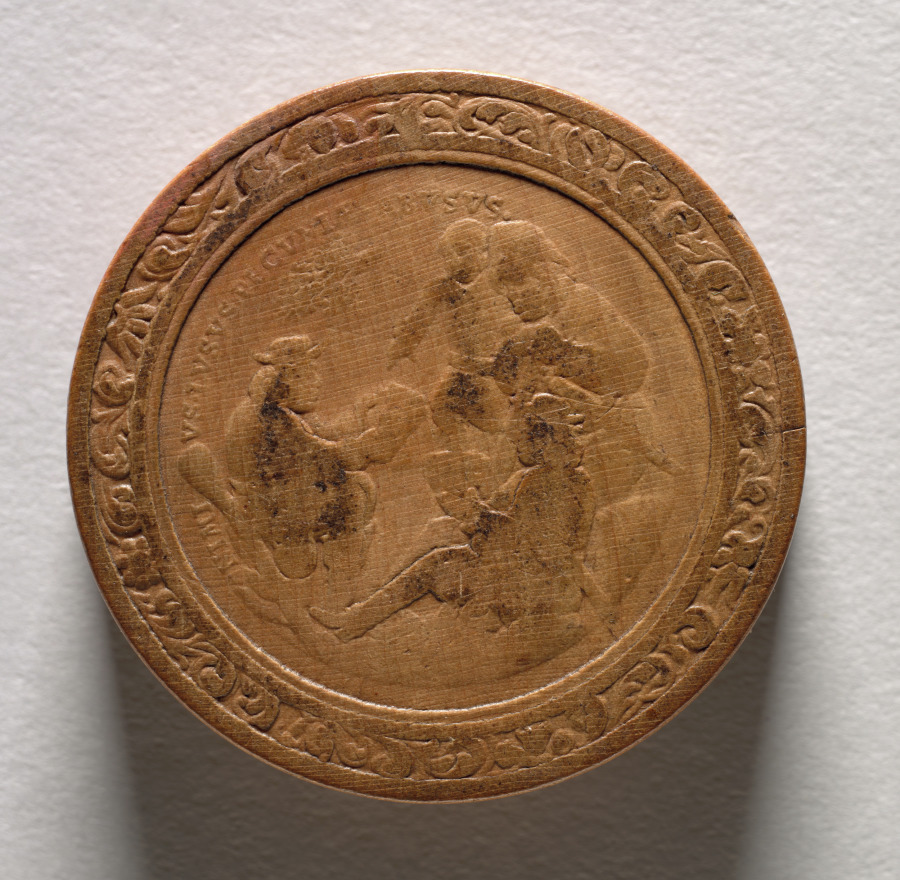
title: Gaming Piece (reverse)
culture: Germany, late 17th-early 18th Century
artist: Martin Brunner (German, 1659–1725)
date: c.1700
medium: wood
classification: Furniture and woodwork